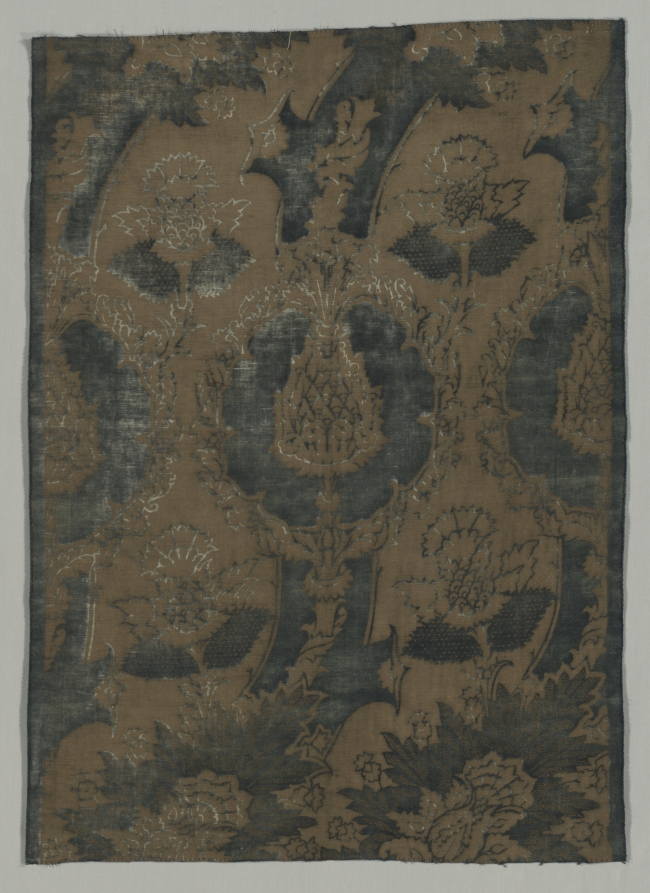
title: Reproduction of a Florentine Velvet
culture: Italy, Venice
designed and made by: Mariano Fortuny y Madrazo (Spanish, 1871–1949)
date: c. 1937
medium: cotton, printed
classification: Textile